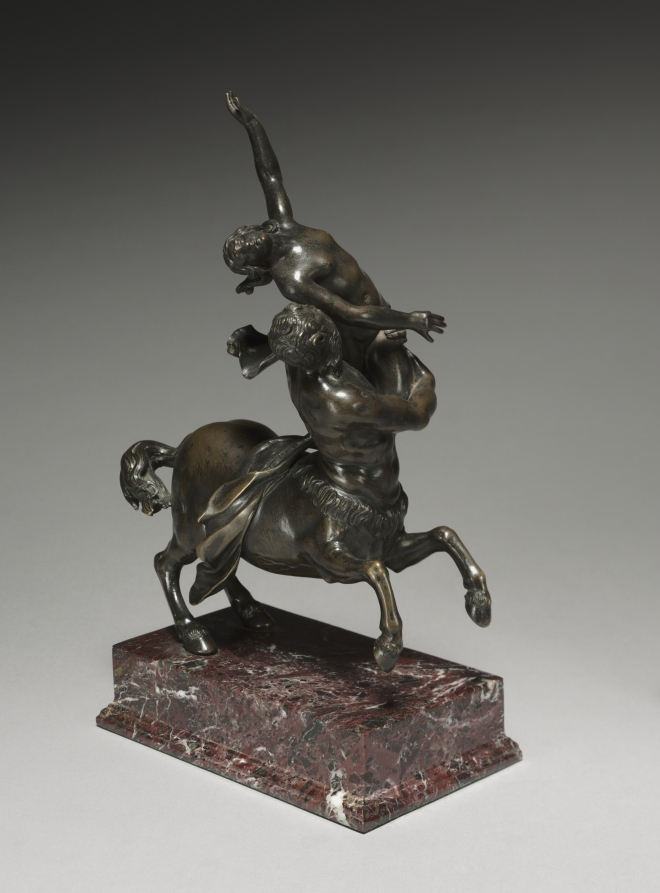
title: Nessus and Deianeira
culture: Italy, 17th century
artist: Francesco Fanelli (Italian, 1661)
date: made in England, probably 1630–40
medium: bronze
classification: Sculpture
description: Fanelli apparently came from Florence and this group clearly indicates that he was familiar with the work of Giambologna, the leading sculptor active in that city around 1600.